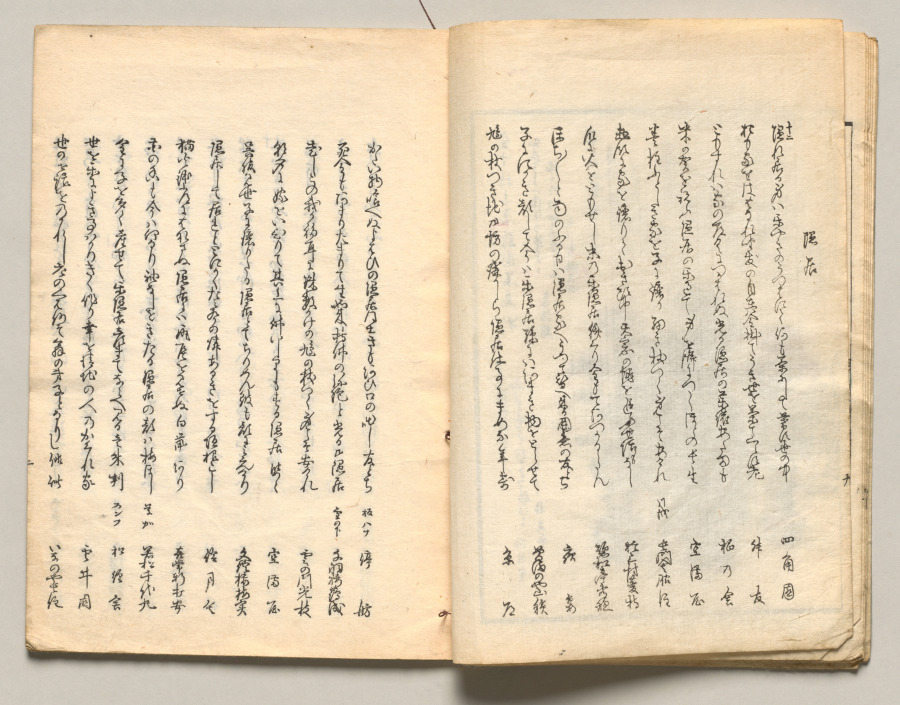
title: Spread Ten from Volume Four of People of Japan in Light Verse (Kyōka)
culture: Japan, Edo period (1615–1868)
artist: Utagawa Hiroshige (Japanese, 1797–1858)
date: 1857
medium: Woodblock-printed book; ink and color on paper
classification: Bound Volume